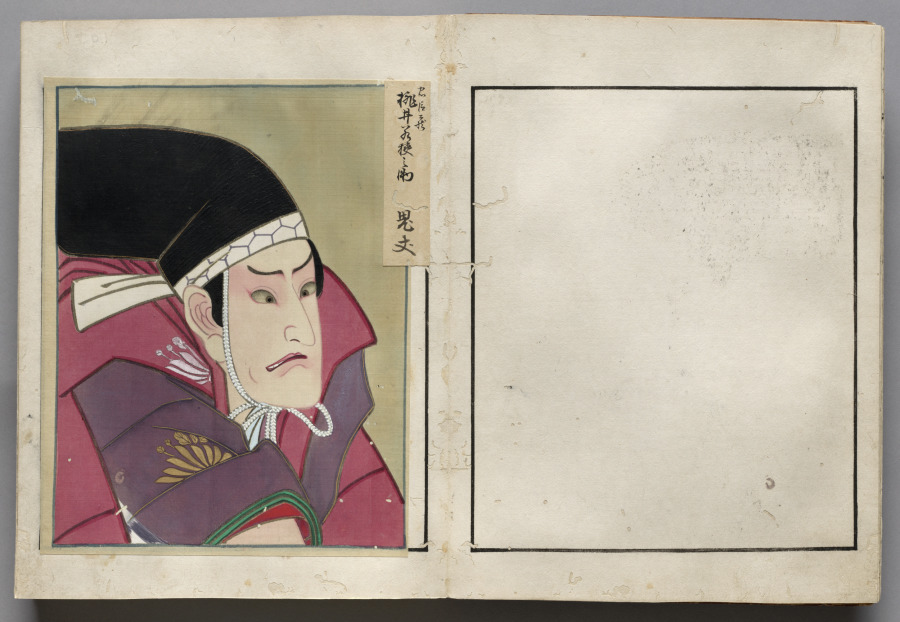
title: Double-Leaf from Album of Actor Portraits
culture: Japan, Edo period (1615–1868)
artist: Shōrakusai (Japanese)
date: c. 1790–1810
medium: double-leaf from an accordion-style album; ink and color on silk (left)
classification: Bound Volume